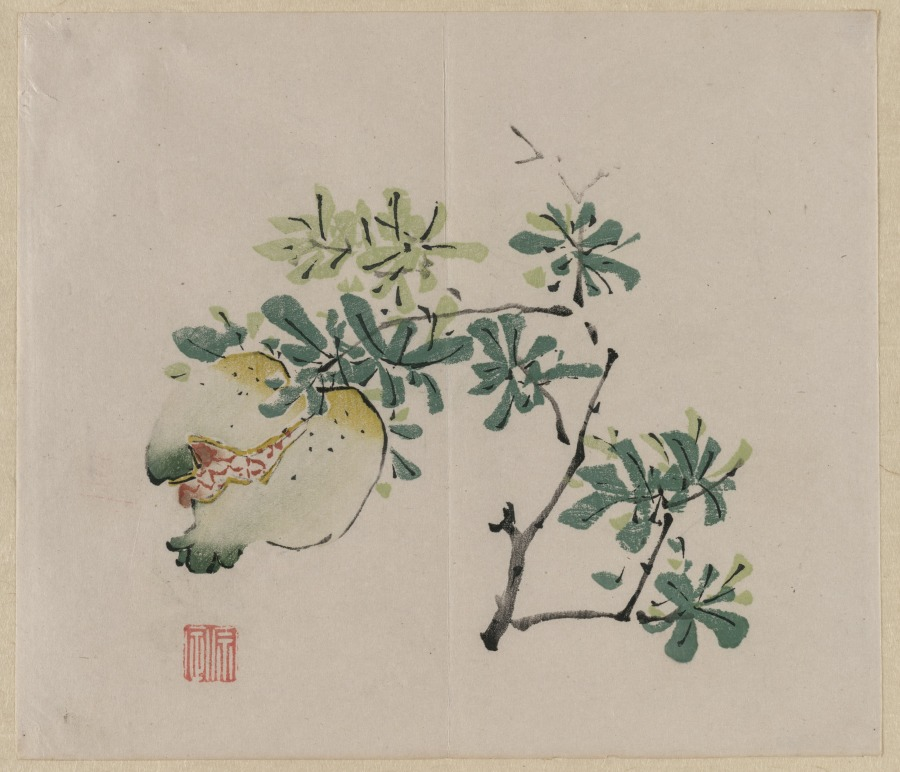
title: Branch with Pomegranate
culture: China, Qing dynasty (1644-1911)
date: 18th Century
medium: color woodblock print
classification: Print